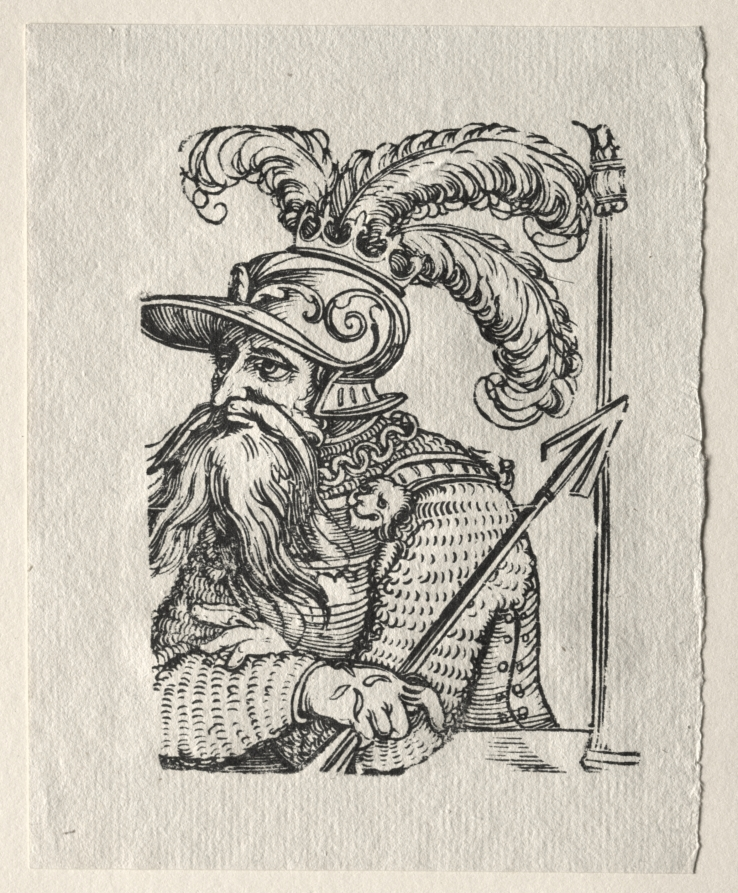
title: Tyrants of the Old Testament: Ahab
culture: Germany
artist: Georg Pencz (German, c. 1500–1550)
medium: woodcut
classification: Print